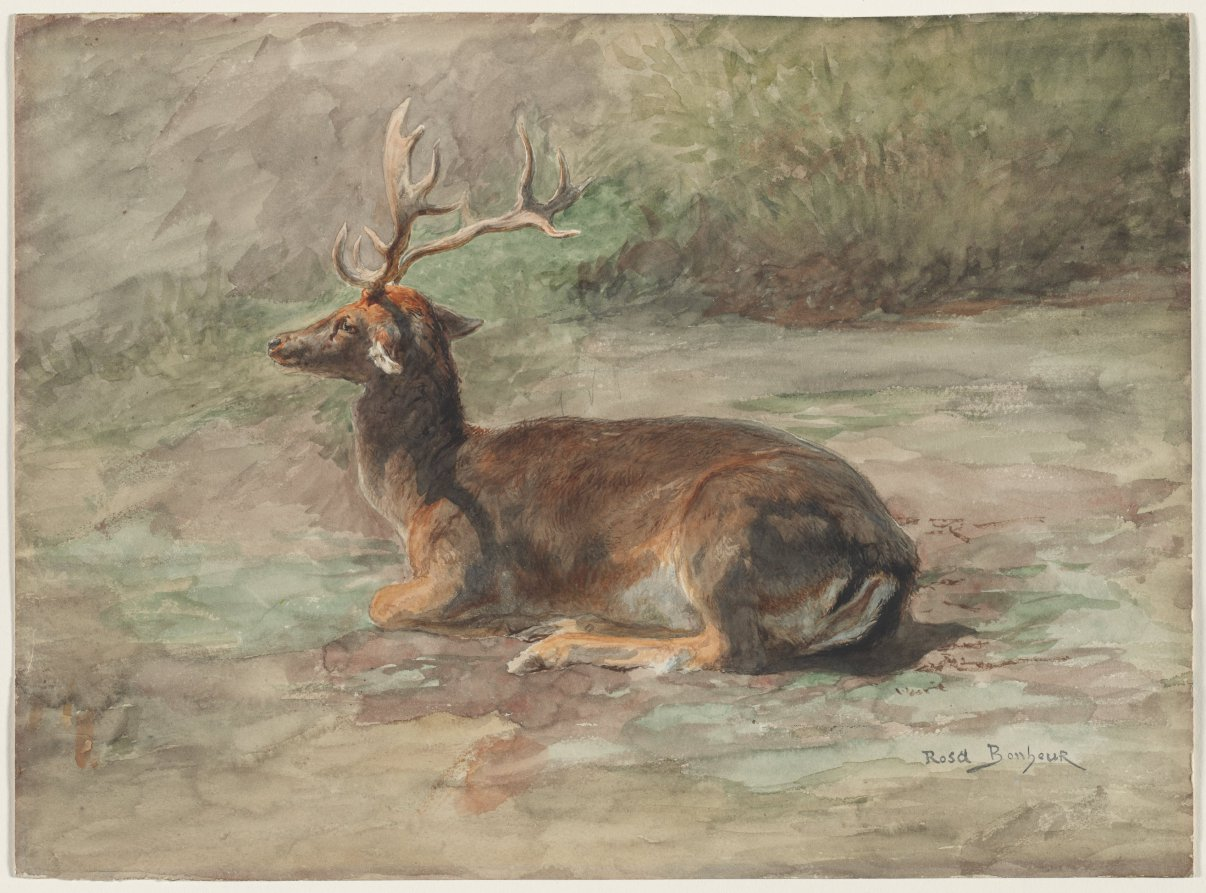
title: Stag Lying Down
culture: France, 19th century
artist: Rosa Bonheur (French, 1822–1899)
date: c. 1875–85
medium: watercolor and gouache over graphite on cream wove paper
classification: Drawing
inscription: stamped, in black ink, at lower right: artist's estate stamp [Lugt 274]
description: This drawing was among many representing stags that were discovered in Rosa Bonheur’s studio after her death. One of the few women of her time who was given the support needed for an artistic career, Bonheur became famous during her lifetime for naturalistic portrayals of animals. Daily carriage rides through the forest around her home enabled her to sketch from nature. One such outing inspired Cleveland’s drawing: Bonheur’s companion recalled “a stag . . . with the sun playing on him through the leaves . . . [who] remained perfectly still.” Watercolor was ideal for such improvisatory studies, allowing Bonheur to work outdoors alongside the subjects she treasured.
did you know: Bonheur constructed a park to house a stag named Jacques, whom she kept as a pet and model.